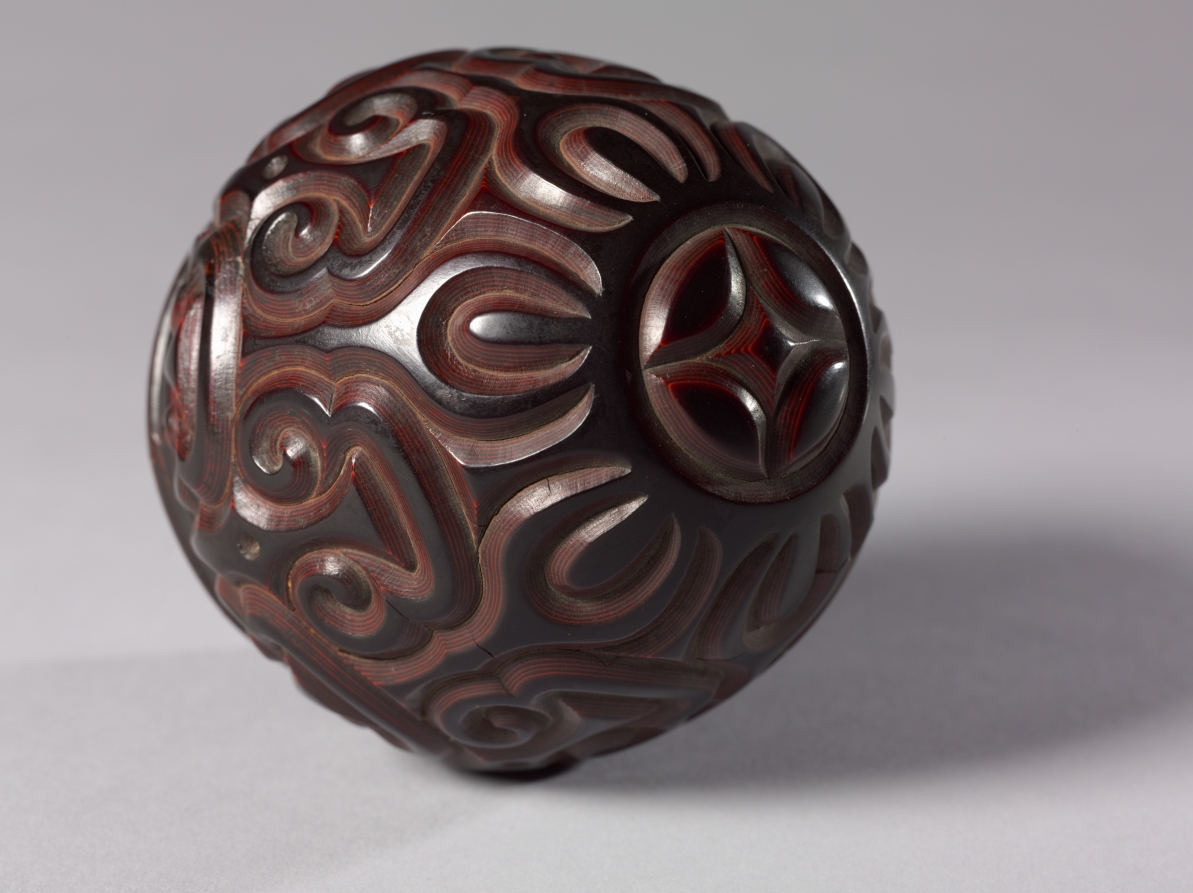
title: Tea Cup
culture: China, Ming dynasty (1368–1644)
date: early 1500s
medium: guri lacquer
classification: Lacquer